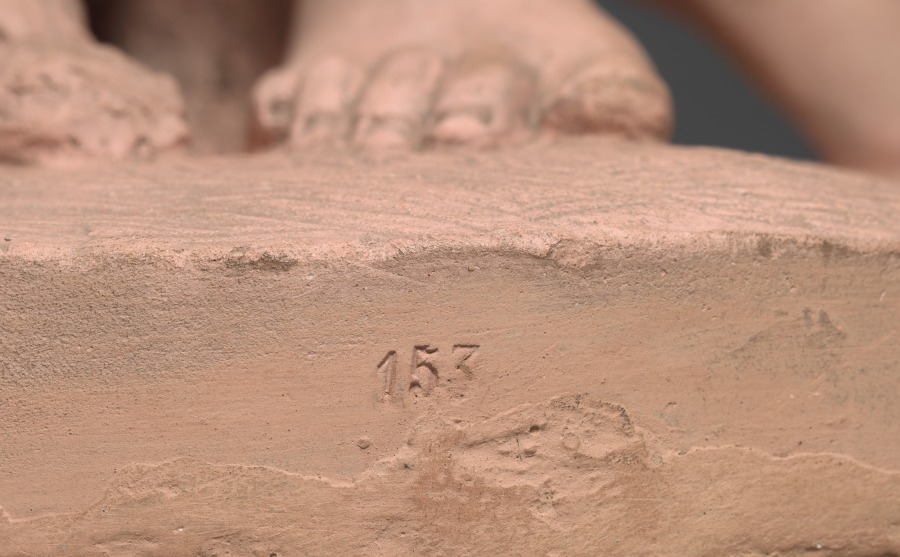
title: Brother and Sister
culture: France, 19th century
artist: Jean-Baptiste Carpeaux (French, 1827–1875)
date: 1875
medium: terracotta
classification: Sculpture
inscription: Signed "JBT" Carpeaux/1875" upper surface of base.